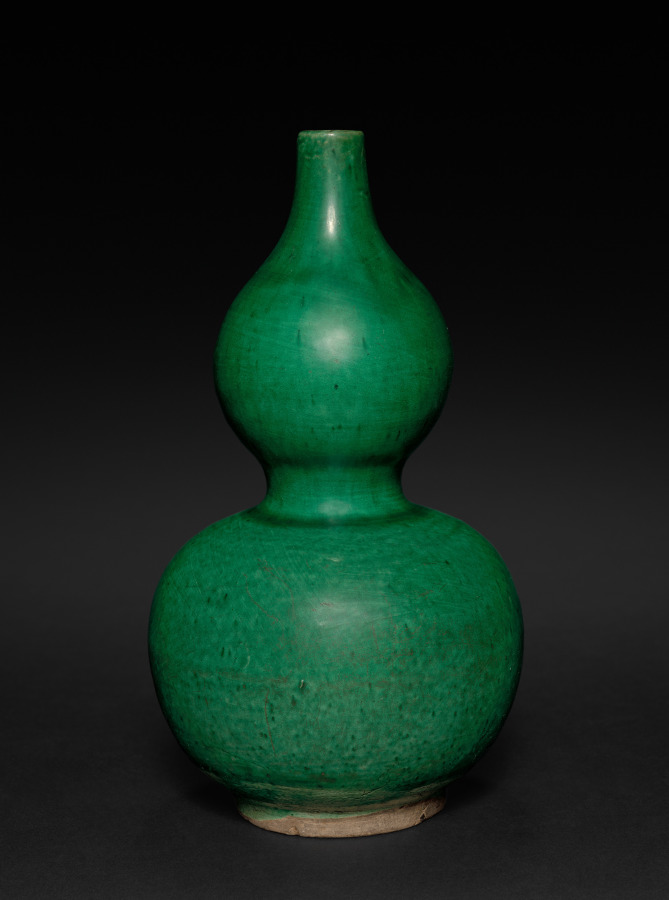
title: Double Gourd-shaped Green Vase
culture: China, Ming dynasty (1368–1644)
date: 1368–1644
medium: stoneware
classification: Ceramic